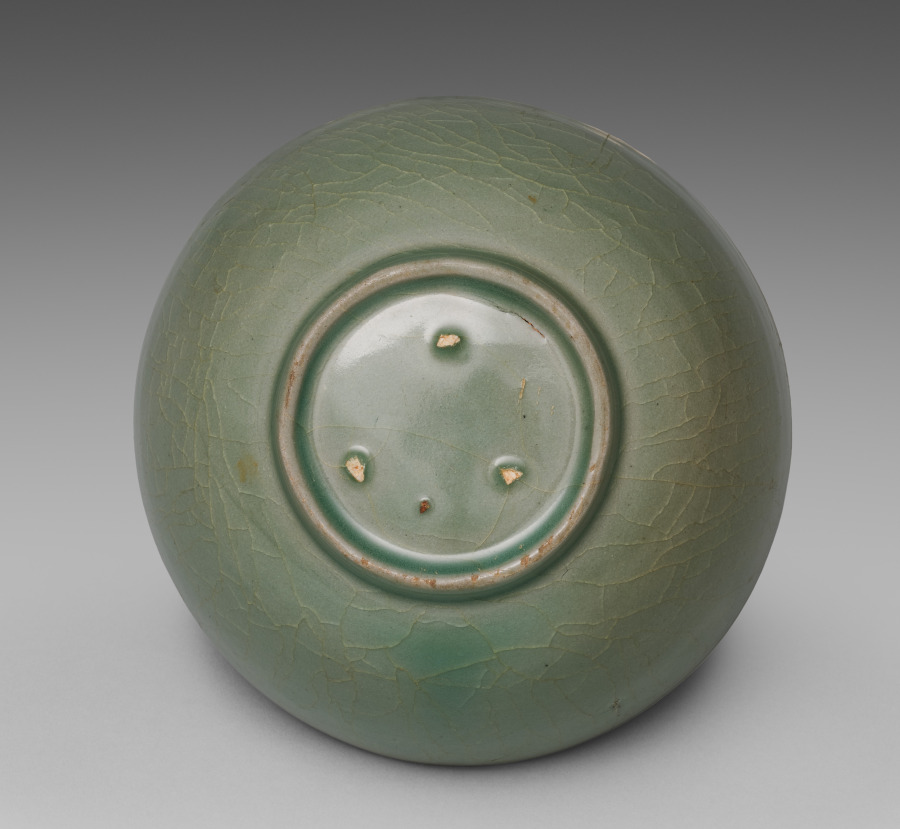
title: Celadon Bowl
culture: Korea, Goryeo dynasty (918–1392)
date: 1200s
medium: Celadon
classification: Ceramic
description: As early as the seventh century, the practice of drinking tea and wine became an important part of elite leisure culture in Korea. A wide bowl like this example was especially suitable for drinking powdered tea shaved from a compressed tea cake, the most commonly enjoyed type during the Goryeo period.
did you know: Crackling occurs when the glaze contracts more rapidly than the clay body during the firing process. In the context of celadon bowls, this phenomenon is not regarded as a flaw but rather as a highly valued aesthetic feature—one that evokes a sense of age.